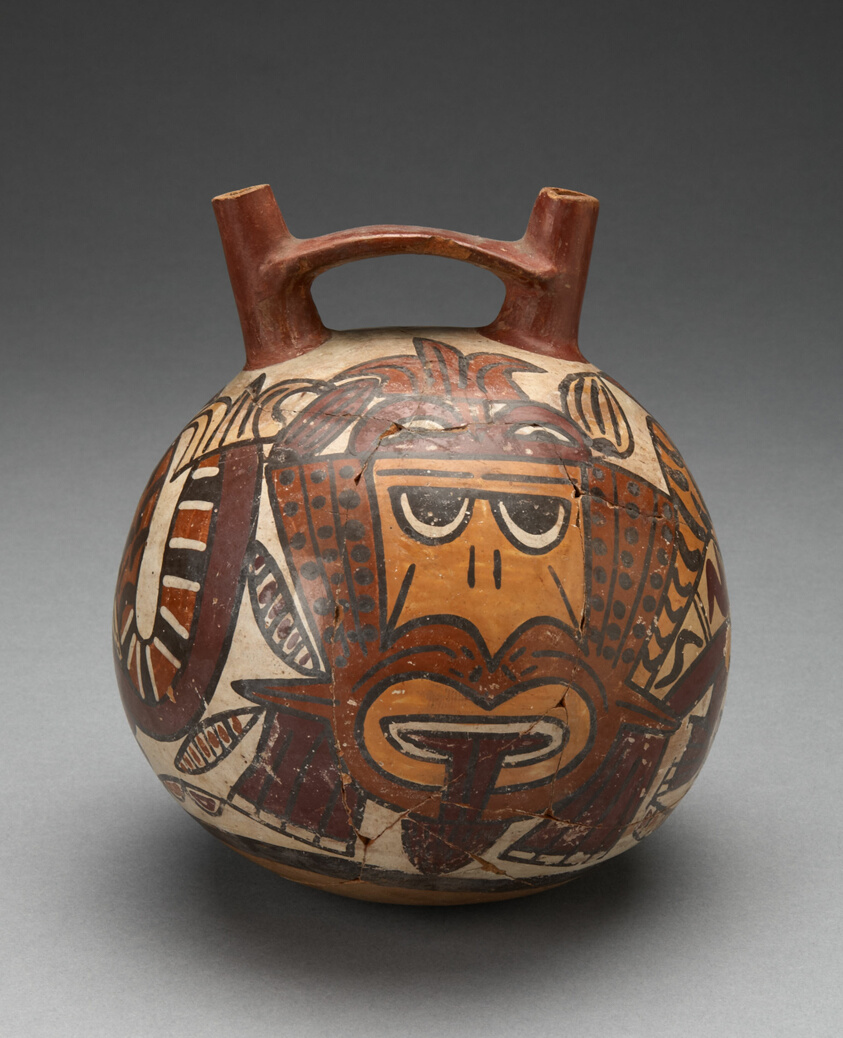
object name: Vessel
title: Double Spout Vessel Depicting Figure Costumed as Pampas Cat with Bean Motifs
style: nazca, early intermediate period, Pre-Columbian, americas, Arts of the Americas, andean, andes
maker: Nazca; South coast, Peru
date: 180 BCE–500 CE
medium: Ceramic and pigment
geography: Nazca Valley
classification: earthenware; ceramics; vessel; art of the americas